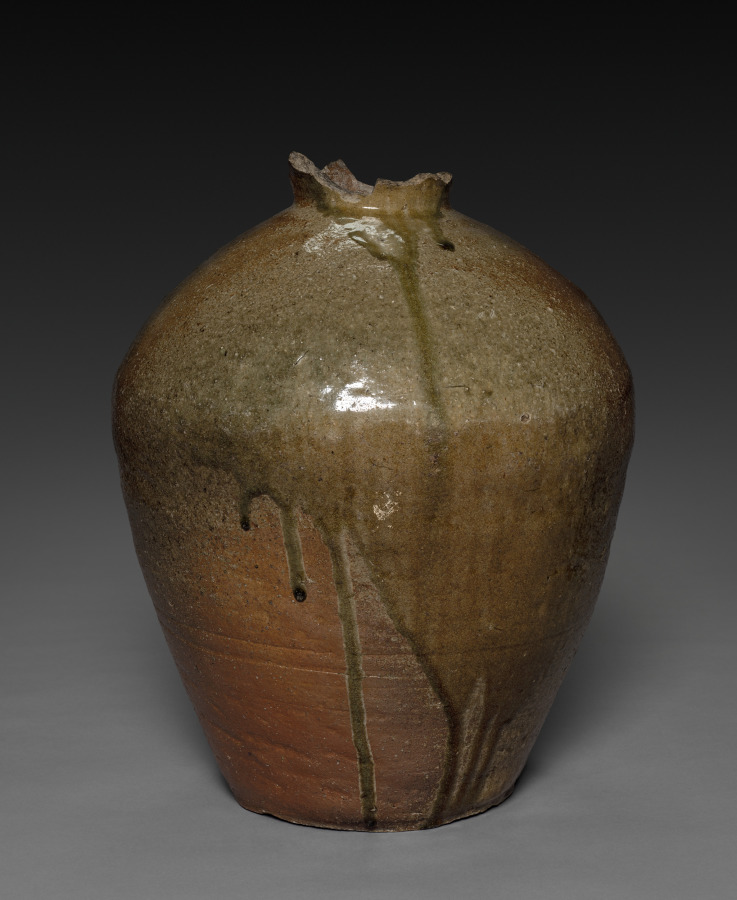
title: Storage Jar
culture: Japan, Muromachi period (1392–1573)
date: 1400s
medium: Stoneware with natural ash glaze (Tamba ware)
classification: Ceramic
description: For centuries the Tokai region surrounding present-day Nagoya has been an especially fertile ceramic production center. One site was a group of kilns located west of Kyoto, in Tamba province. Nestled in a farming valley in the mountains behind the modern port of Kobe, Tamba required a regular supply of storage vessels and sturdy containers for distributing grain. This jar was formed in three sections, each fluted to the next and turned on a potter's wheel to scrape off excess material. Both interior and exterior walls were smoothed with a wooden or bamboo tool, leaving markings on the lower body and shoulder. The neck opening is small and wheel-turned, as is the neck, which bears fine lines and a matte-glazed surface. The lustrous green glaze that highlights the jar once trailed from the vessel's lip and clung to the entire shoulder wall, mingling with the warm, orange-brown tone of the clay body underneath. The surface is crackled with craters where stone material within the clay migrated up to the surface during firing and then fell away. The result is a particularly rich and varied "landscape," typical of Tamba ware's subdued, earthy vitality.